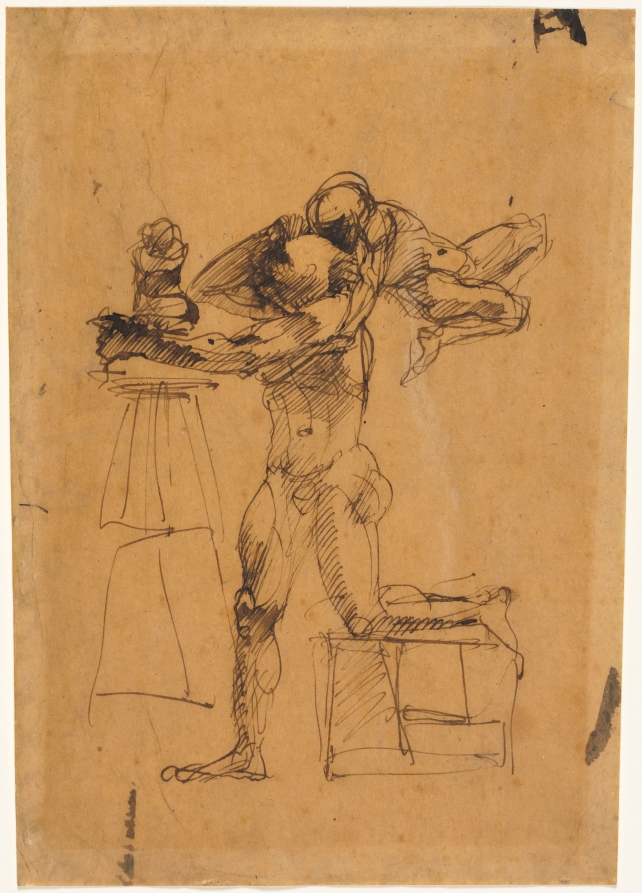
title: The Genius of the Sculptor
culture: France, 19th century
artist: Auguste Rodin (French, 1840–1917)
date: c. 1880–83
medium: pen and brown ink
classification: Drawing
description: Auguste Rodin repeatedly explored the theme of creative male genius in major works, such as the famous Thinker, a cast of which sits outside the Cleveland Museum of Art on the south terrace. In this drawing, Rodin depicted the artist in active thought with his hand on his head, accompanied by a wingless “genius” floating above him. He derived this symbol of inner creative energy from the traditional subject of the winged muse, examples of which also appear on Michelangelo’s Sistine Chapel ceiling as companions to God the Father.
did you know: In other similar depictions of the theme seen in this drawing, Auguste Rodin depicted Genius as a woman.